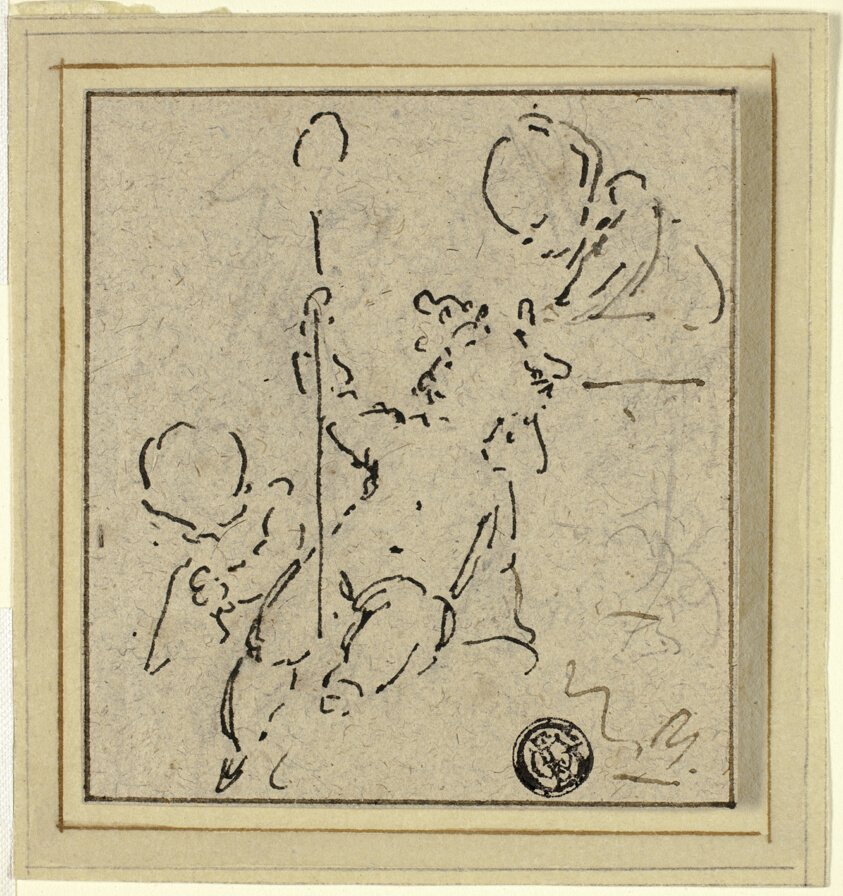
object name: Drawing and Watercolor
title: Three Putti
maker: Jacob de Wit (Dutch, 1695-1754)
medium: Pen and brown ink over black chalk on buff laid paper, tipped onto cream laid paper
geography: Holland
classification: pen and ink drawings; drawings (visual works); prints and drawing